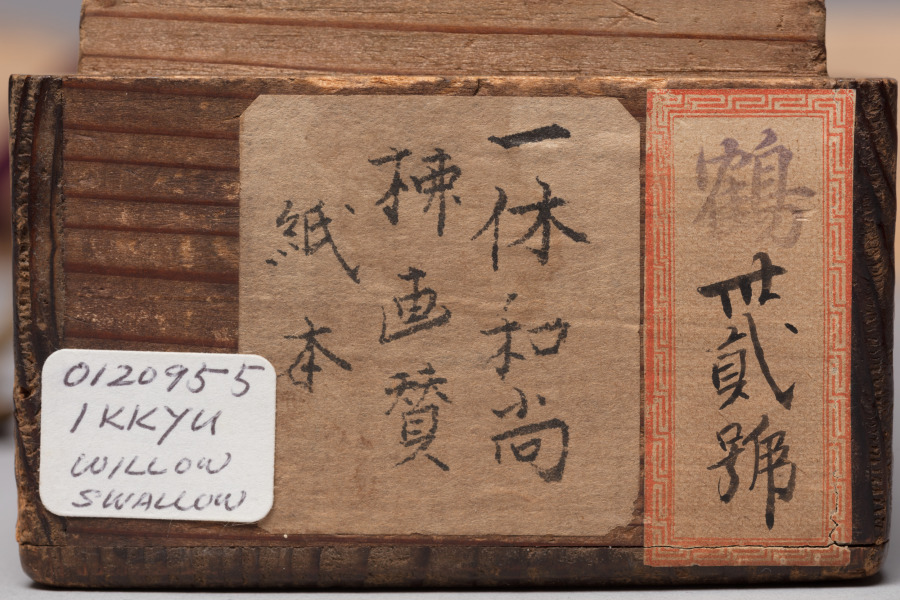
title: Calligraphy with Willow and Swallows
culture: Japan, Muromachi period (1392–1573)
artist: Ikkyū Sōjun (Japanese, 1394–1481)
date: 1400s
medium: hanging scroll, ink on paper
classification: Painting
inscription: How many days has it rid itself of the crow’s cloth? It knows not!/ Lovely is its body so nimble and neat./ Neither men of wealth, courtly position, or power can come close to the unfettered, noble swallow!/ With the coming of spring, it seems to be flying about, dancing around the grass hut of the foolish Priest. signed: Unkasō Isshi Tōkai jun Ikkyū shi ga ippitsu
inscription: outer box inscribed: Ikkyū Ōshō Enshi-zu Jigasan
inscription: inner box side lid inscribed: Showa 50 (1975), November by Tayama Honan with kao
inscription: Inner box side lid inscribed: Ikkyū Ōshō Bokuseki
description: The famed Buddhist monk Ikkyū is best remembered for his calligraphy. Calligraphic conventions of his time called for brushwork that did not vary much in style from character to character. However, as Ikkyū’s lines progress, his brushwork wanders between standard script and a sort of shorthand, marked by an uneven distribution of ink and a reduction of the characters to only the most necessary strokes. Ikkyū’s direct communication of emotion via brushwork became characteristic of the works produced by monks affiliated with the temple Daitokuji later in the Edo period (1615–1868).